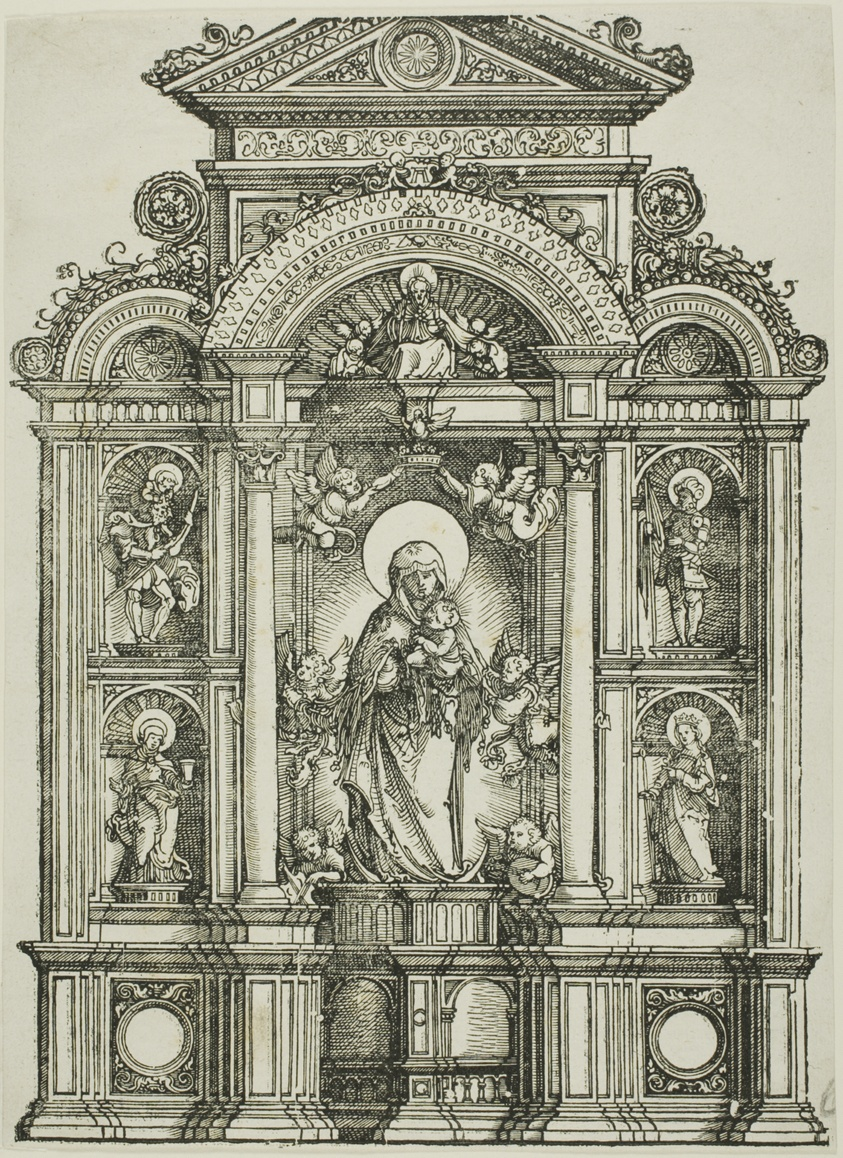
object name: Print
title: Altarpiece with the Beautiful Virgin of Regensburg and Saints Christopher, Mary Magdalen, Florian and Catherine Standing in Niches, with God the Father Above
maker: Albrecht Altdorfer (German, c.1480-1538)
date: 1519/38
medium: Woodcut in black on cream laid paper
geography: Germany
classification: woodcut; print; prints and drawing